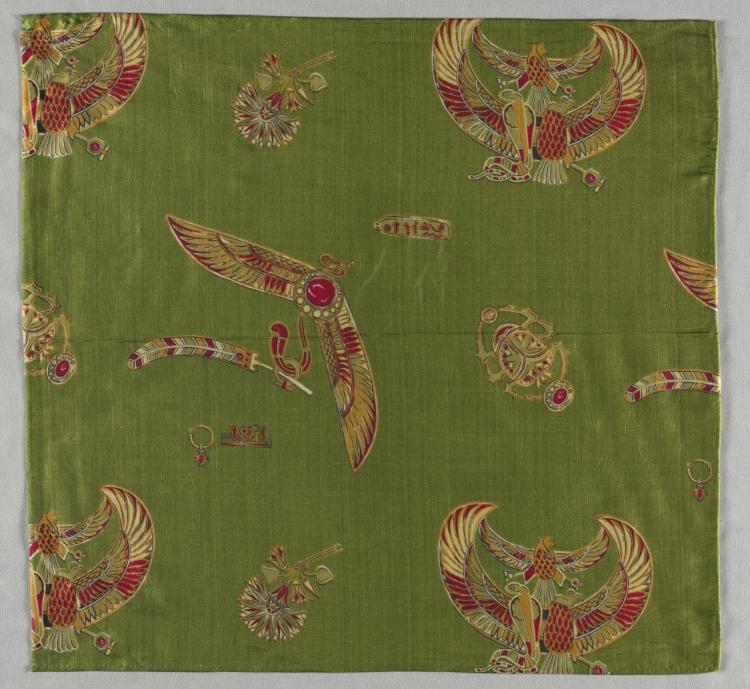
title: Textile Fragment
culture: United States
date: c. 1905–10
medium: plain weave silk, printed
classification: Textile